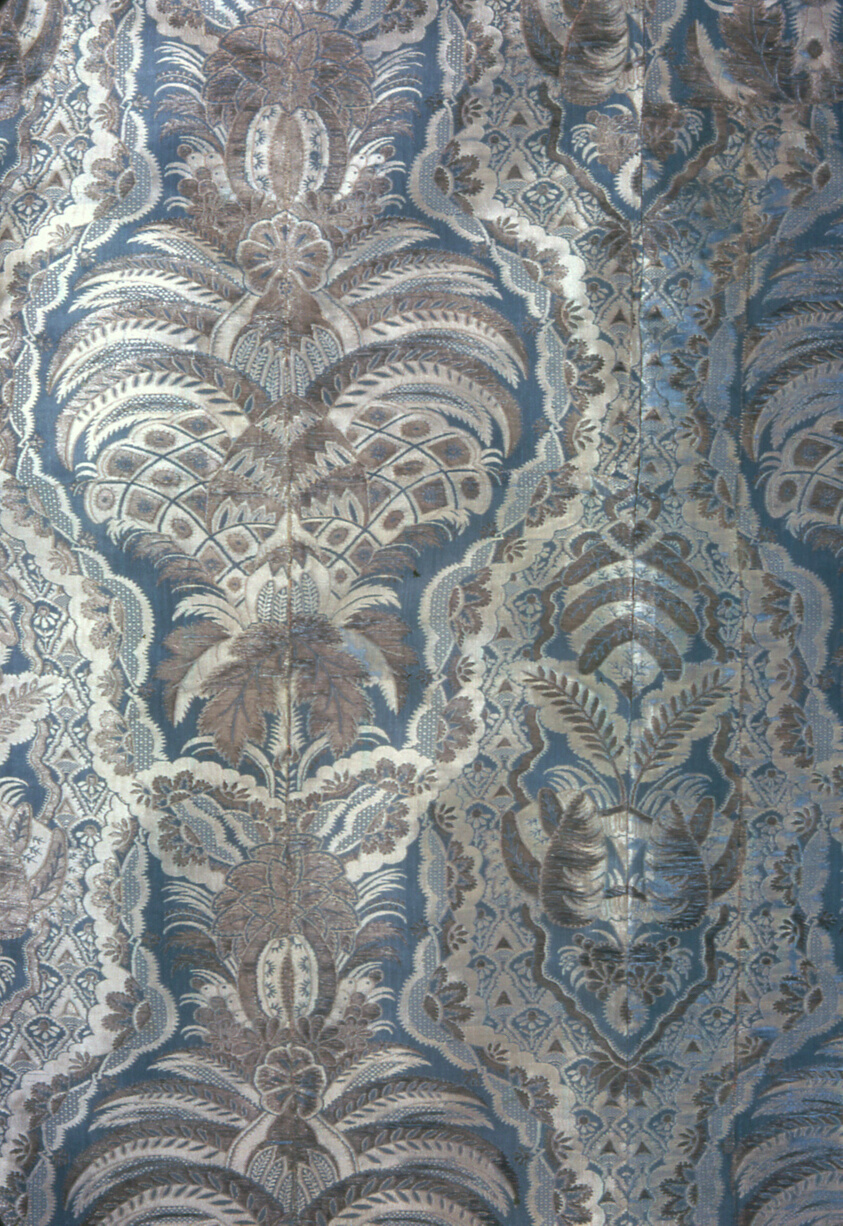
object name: Textile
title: Panel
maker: France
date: Late 1720s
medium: Silk, silvered-metal-strip-wrapped silk, warp-float faced satin 7:1 weave of two-color complementary ground wefts with supplementary binding warps tying supplementary brocading wefts and some self-patterning ground wefts in twill interlacing, and self-patterned by areas of plain interlacing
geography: France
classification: textile; weaving